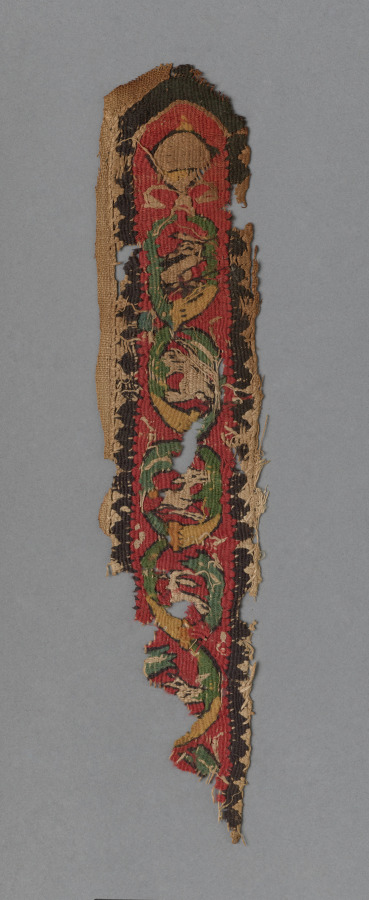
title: Fragment from a Tunic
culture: Egypt, 6th - 16th century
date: 500s - 1500s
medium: tabby weave with inwoven tapestry ornament, linen and wool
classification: Textile